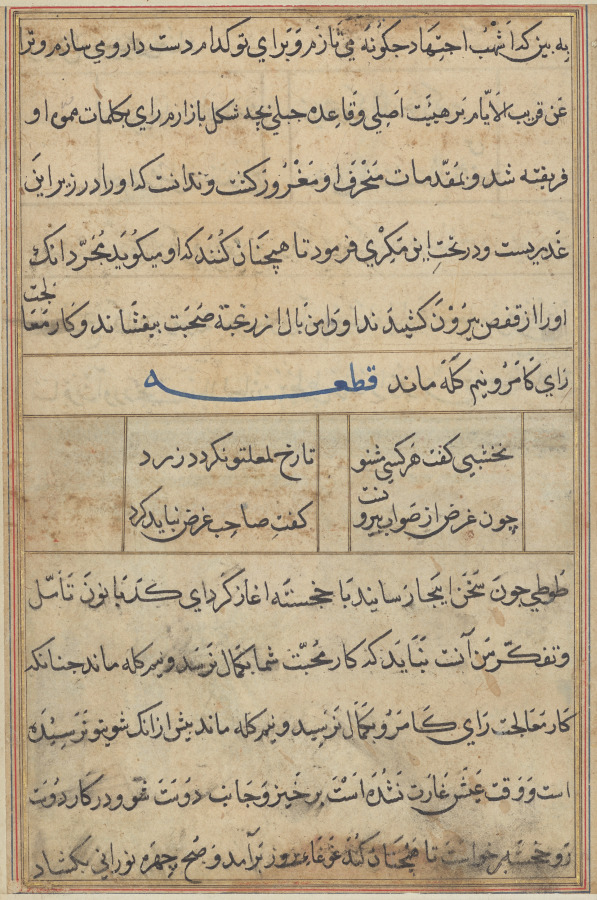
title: Page from Tales of a Parrot (Tuti-nama): text page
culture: Mughal India, court of Akbar (reigned 1556–1605)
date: c. 1560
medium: gum tempera, ink, and gold on paper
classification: Painting